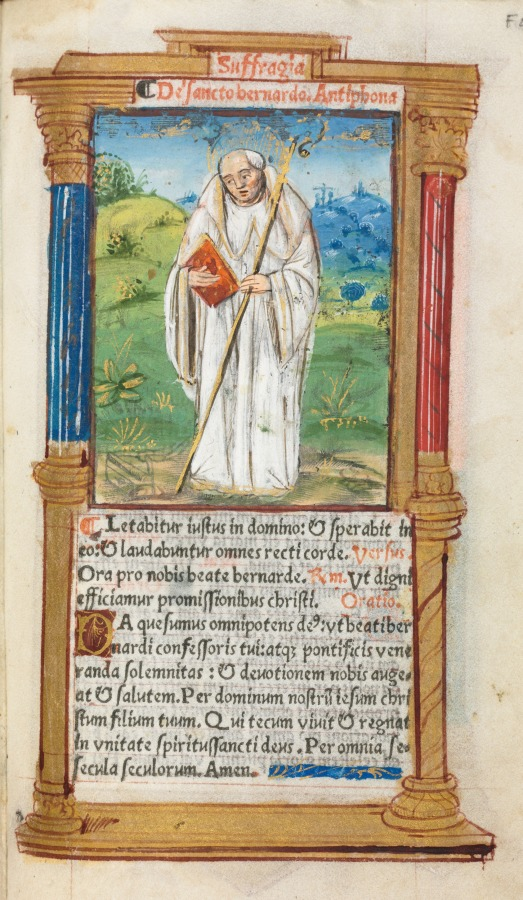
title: Printed Book of Hours (Use of Rome): fol. 108r, St. Bernard of Clairvaulx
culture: France, Paris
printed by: Guillaume Le Rouge (French, Paris, active 1493–1517)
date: 1510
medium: 112 Printed folios on parchment, bound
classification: Bound Volume